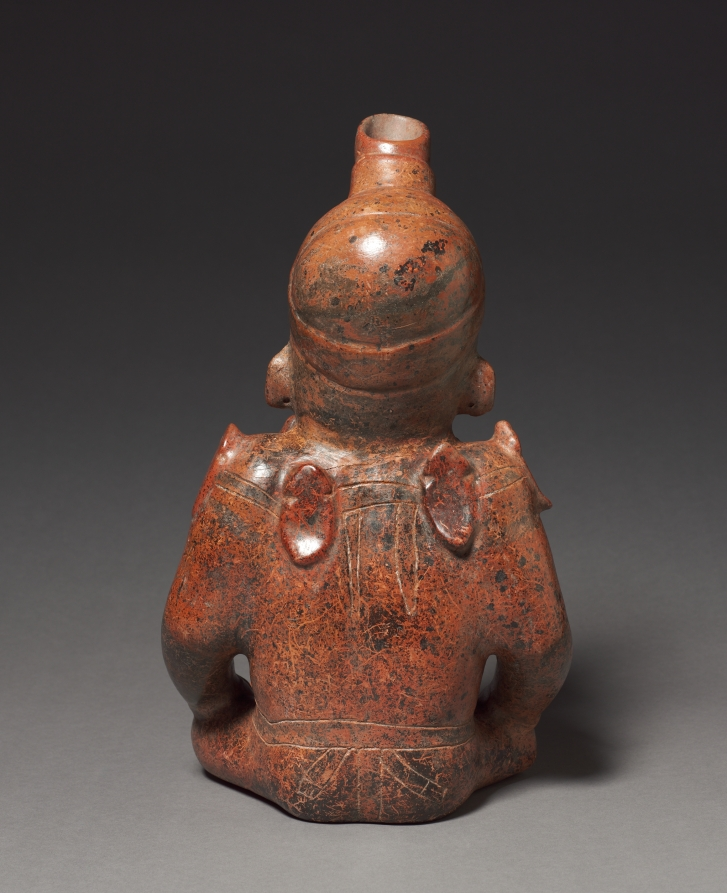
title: "Horned" Male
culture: West Mexico, Colima, Comala style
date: 100 BCE–300 CE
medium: earthenware with colored slips, black burial deposits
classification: Sculpture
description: This figure’s concentrated, otherworldly expression is emphasized by the hornlike element strapped to its forehead. This "horn" may be the spire of a conch shell, which comes from water and, therefore, refers to fertility—likely an important ritual concern of West Mexican chiefs. The element also could represent the "horn of power" worn in some areas of the world by shamans, the spiritual leaders and healers of small, nonindustrial societies.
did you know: This figure’s “horn” may be the spire of a conch shell, a reference to fertility.